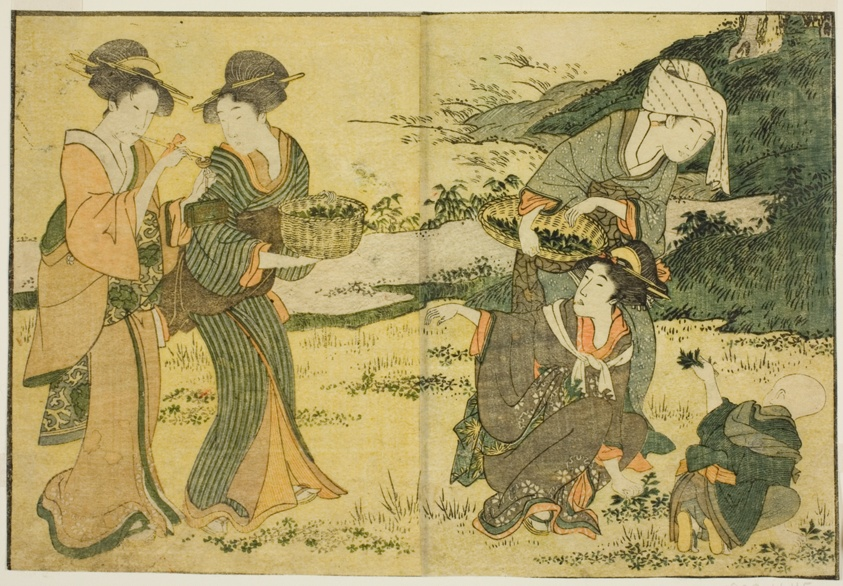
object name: Print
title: Gathering Spring Herbs, from the illustrated book "Picture Book: Flowers of the Four Seasons (Ehon shiki no hana)," vol. 1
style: Japanese (culture or style)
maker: Kitagawa Utamaro 喜多川 歌麿; Japanese, 1753 (?)-1806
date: New Year, 1801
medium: Color woodblock print; double-page illustration from book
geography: Japan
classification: print; asian art